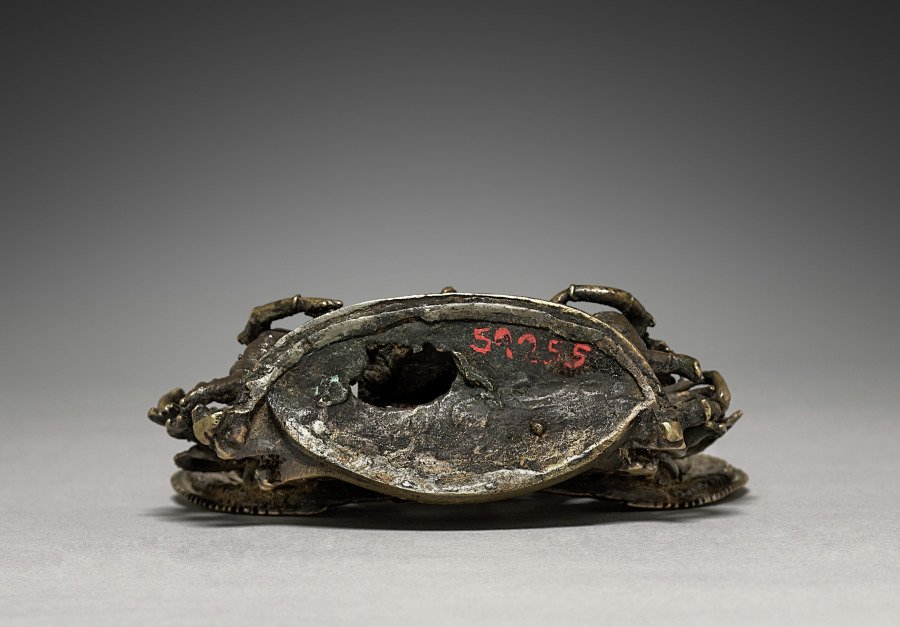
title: Triumph of the Buddha, Marvijaya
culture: Nepal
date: 1400s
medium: bronze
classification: Sculpture